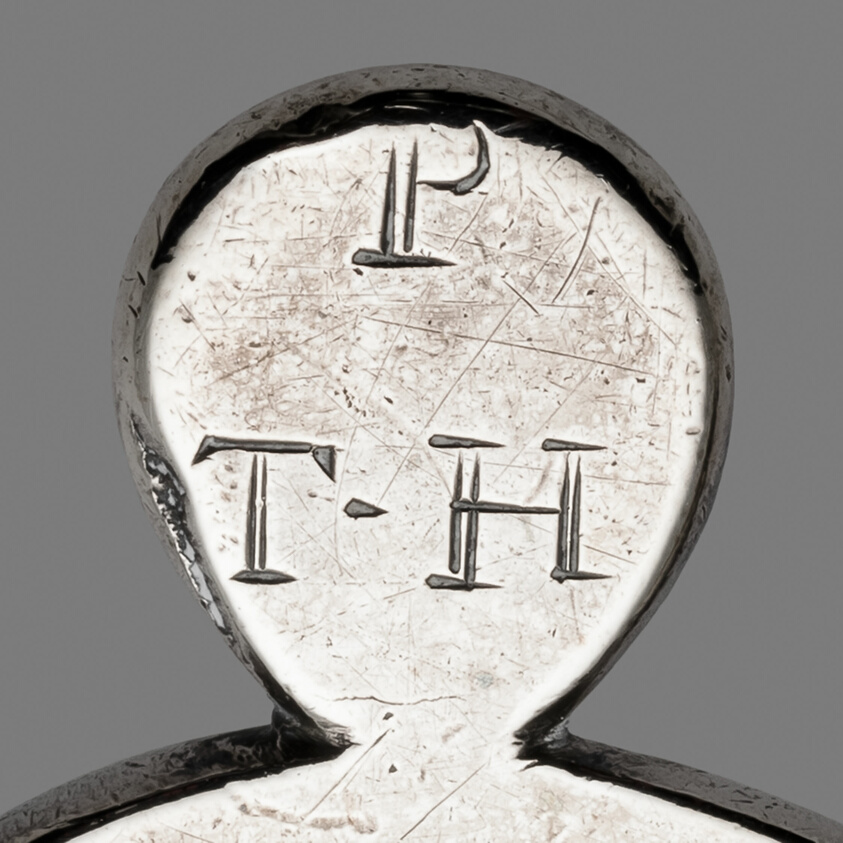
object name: Metalwork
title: Punch Strainer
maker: William Simpkins; American, 1704–1780; Boston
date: 1743–60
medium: Silver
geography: Boston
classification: utensil for serving food; utensil; silver; american decorative arts; american arts; decorative arts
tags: dining, drinking